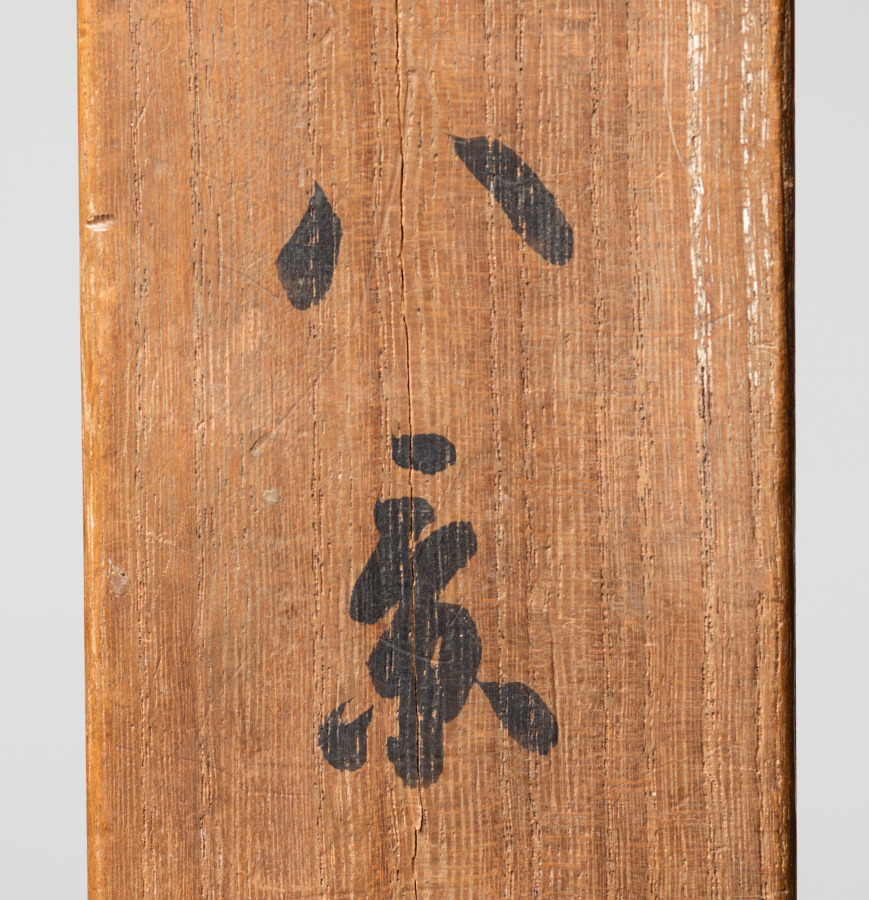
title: Landscape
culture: Japan, Edo period (1615–1868)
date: early 1600s to mid-1800s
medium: hanging scroll; ink on paper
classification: Painting